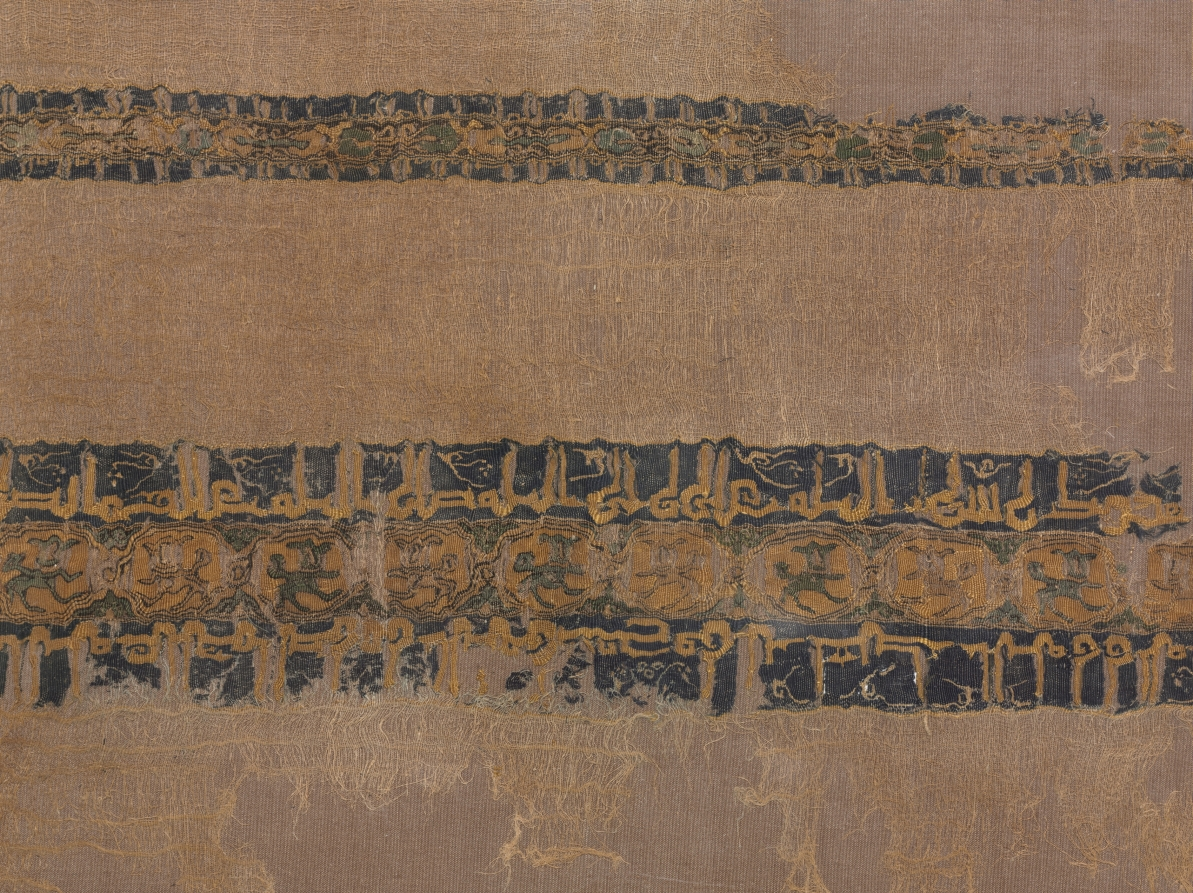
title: Turban end with tiraz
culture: Egypt, Fatimid period, Caliphate of al-Zahir, 1031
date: 1031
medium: plain weave with inwoven tapestry weave: linen and silk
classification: Textile